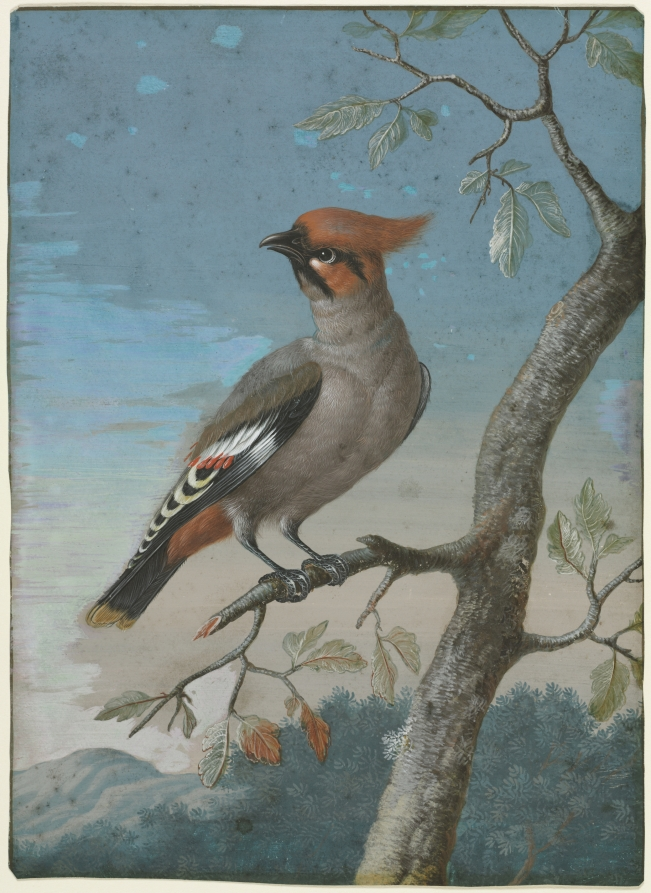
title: Bird Study: Bohemian Waxwing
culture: England, 18th century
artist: George Edwards (British, 1694–1773)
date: c. 1714–73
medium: watercolor with gouache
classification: Drawing